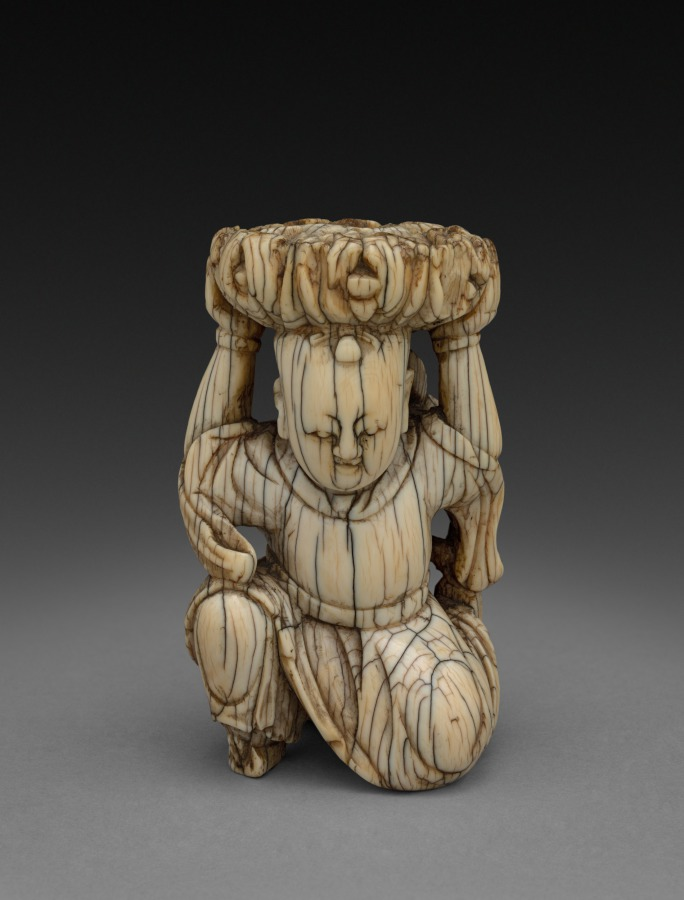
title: Kneeling Boy, Fragment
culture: China, Ming dynasty (1368–1644)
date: 1500s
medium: ivory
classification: Ivory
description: In the Ming dynasty (1368–1644), luxury items became more affordable to larger parts of the society, including women, merchants, and literati in non-official positions. Imperial patronage and a growing urban population encouraged consumption of luxury goods and local craftmanship. This ivory illustrates the superb carving skills and the creative mind of the skilled artisan who sought clients on a competitive market.